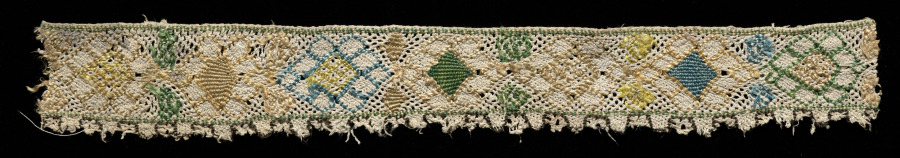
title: Lace Fragment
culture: Greece, Crete ?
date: 1600s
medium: Needle lace, burato (twined ground and darned in one direction) insertion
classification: Lace